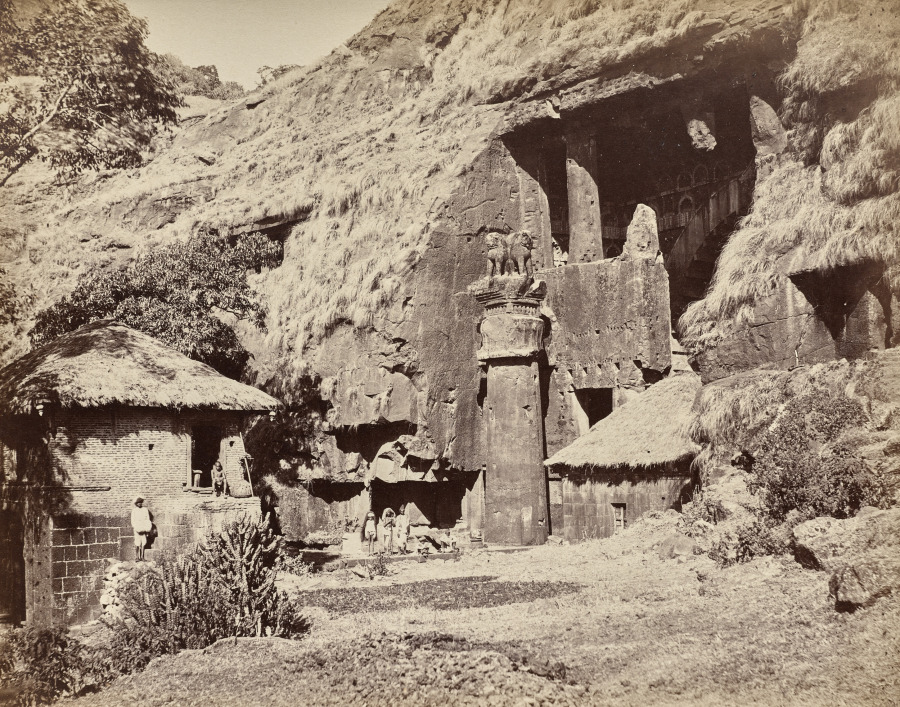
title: Caves of Karlie: No. 1, The Approach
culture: India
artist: William Johnson (British, active India, 1852–1868)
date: 1855–62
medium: albumen print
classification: Photograph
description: This early view of the entrance to the ancient Karlie, or Karla, Caves in Western India shows the site before its restoration, including the monumental entrance pillar topped by a sculpture. Windows cut into the rock provided light inside. The shrines, created between the 2nd century BCE and the 5th century CE, provided sanctuary and shelter for monks but also for travelers and traders.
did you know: The largest prayer hall in this complex of Buddhist shrines cut into the rock is a sanctuary 124 feet long with a ribbed vault 45 feet high.